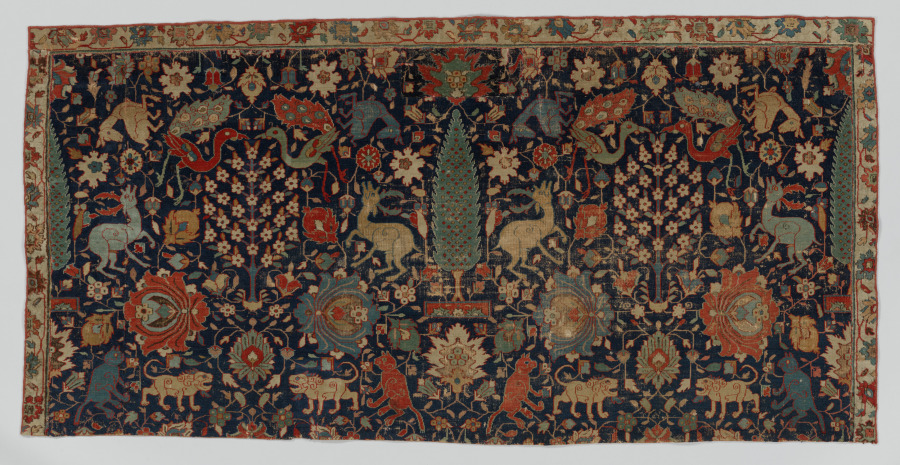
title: Portion of a Carpet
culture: Iran, Northwestern, 17th century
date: 1600s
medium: knotted pile: jufti knot; wool and cotton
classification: Carpet